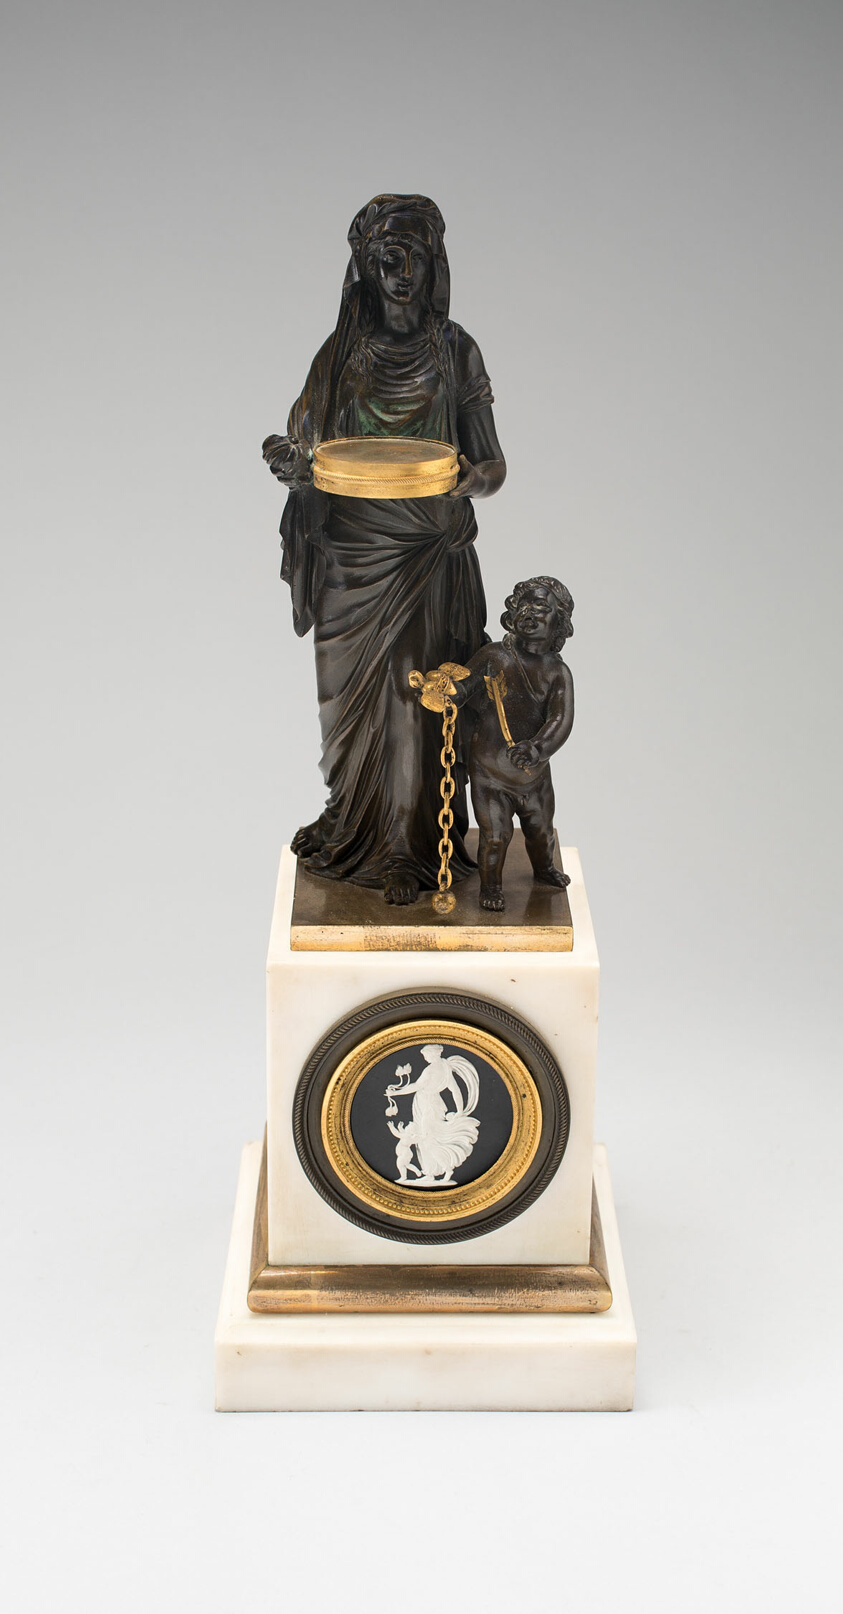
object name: Decorative Arts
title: Venus and Cupid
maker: Wedgwood Manufactory (England, founded 1759)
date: 1775/1800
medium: Bronze, marble, stoneware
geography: Burslem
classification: sculpture; stoneware; european decorative arts; ceramics; decorative arts